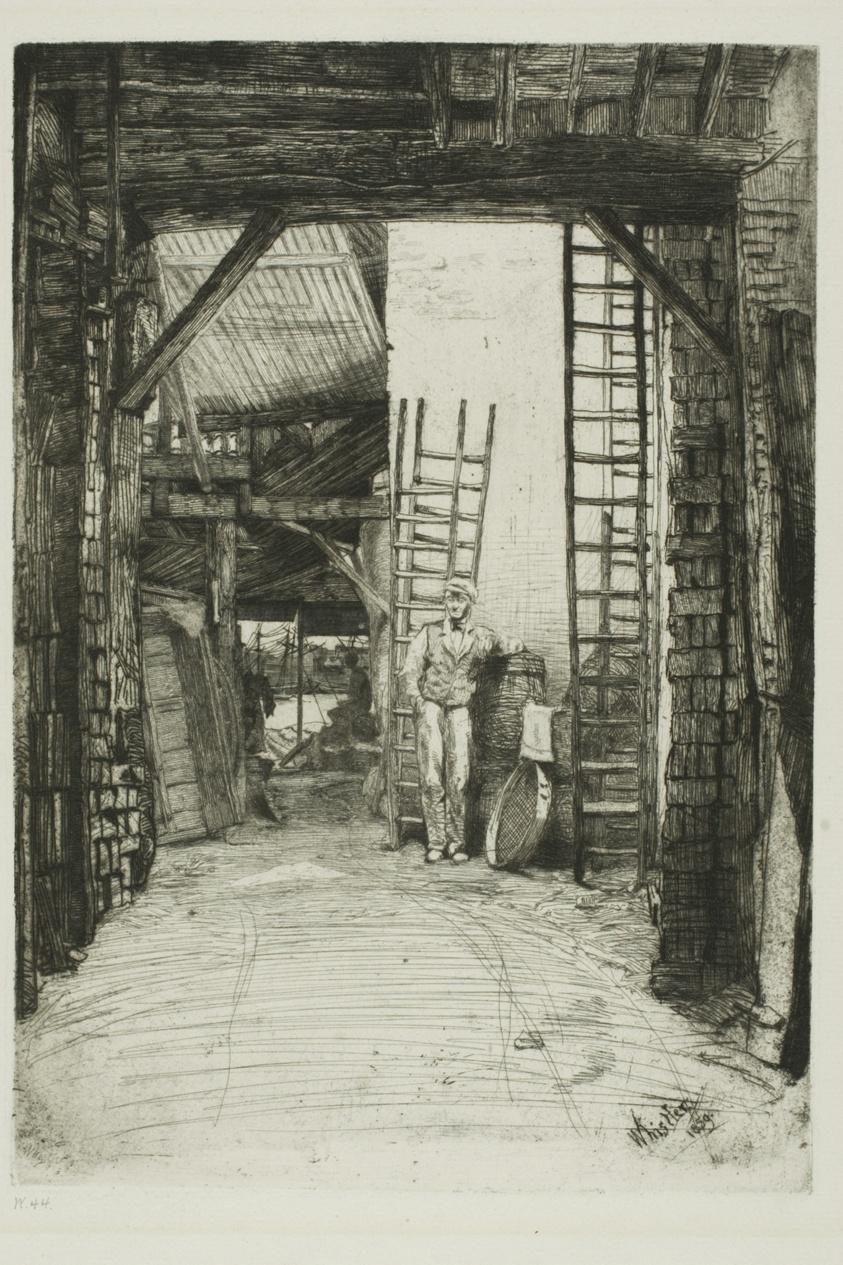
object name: Print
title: The Lime-Burner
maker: James McNeill Whistler (American, 1834-1903)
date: 1859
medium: Etching and drypoint with foul biting in black ink on ivory laid paper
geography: United States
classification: etching; foul biting; print; prints and drawing; paper; drypoint